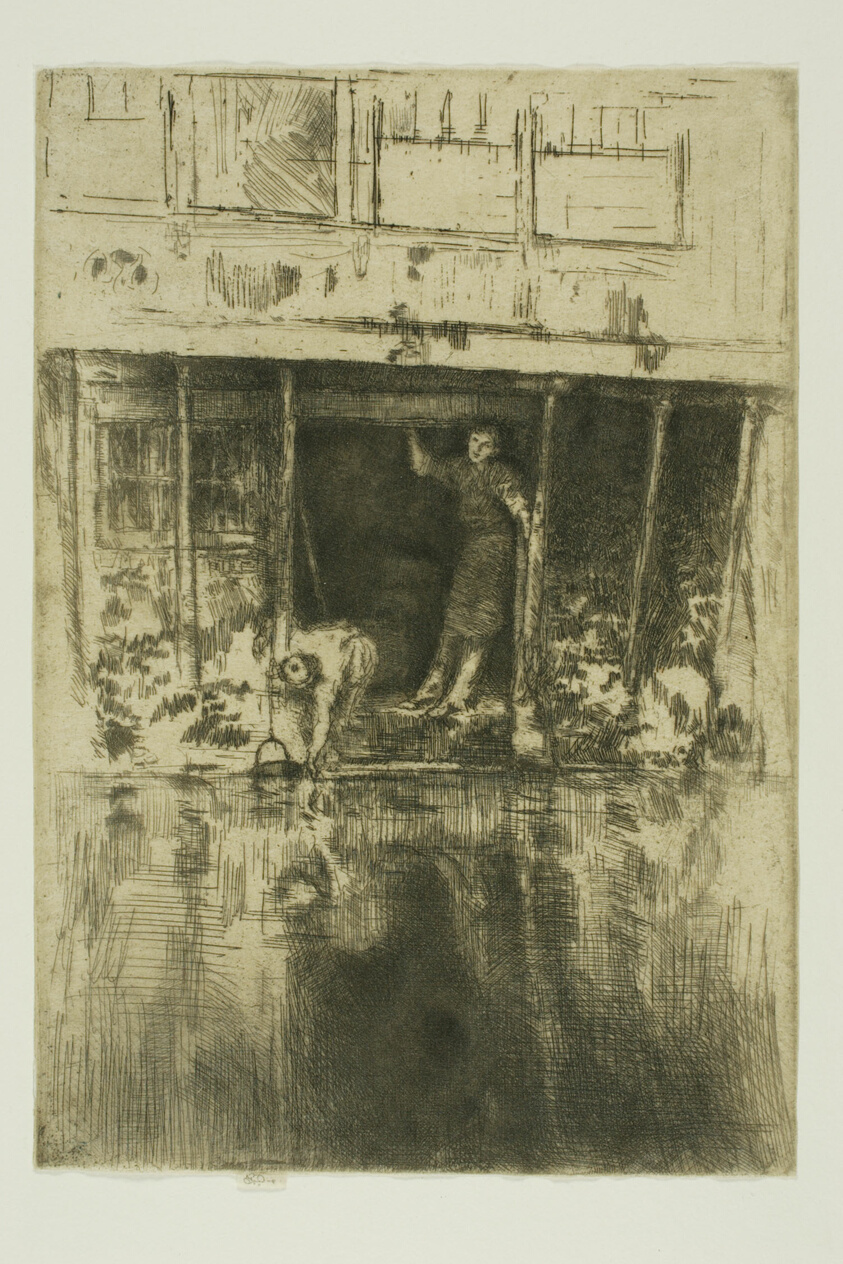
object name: Print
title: The Pierrot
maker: James McNeill Whistler (American, 1834-1903)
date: 1889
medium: Etching and drypoint with foul biting in black ink on cream Japanese paper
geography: United States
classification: etching; drypoint; print; prints and drawing; foul biting; paper